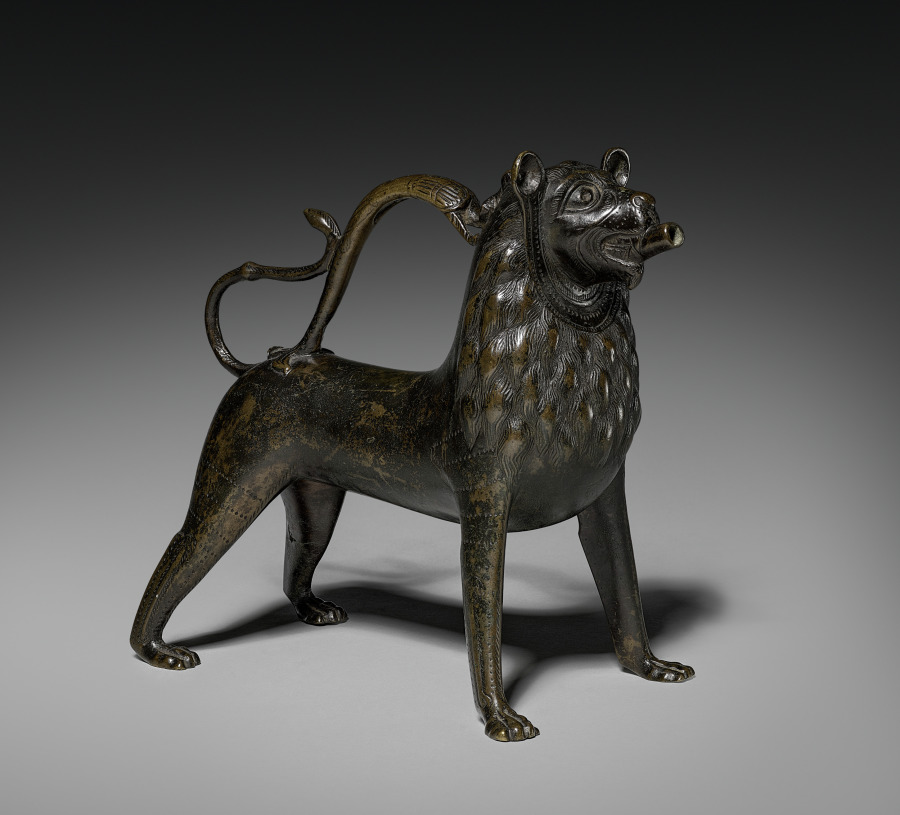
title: Lion Aquamanile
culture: Germany, Lower Saxony, Hildesheim, Gothic period, first half 13th century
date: 1200–1250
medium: bronze: cast, chased, and punched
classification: Sculpture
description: An aquamanile is a water vessel used for washing hands both at church altars and at the dinner tables of upper-class patrons. They often took the form of fantastic beasts such as dragons and unicorns or animals such as horses, birds, dogs, and lions, like this one.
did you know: The handle of this vessel is in the shape of a dragon with a long curving tail.